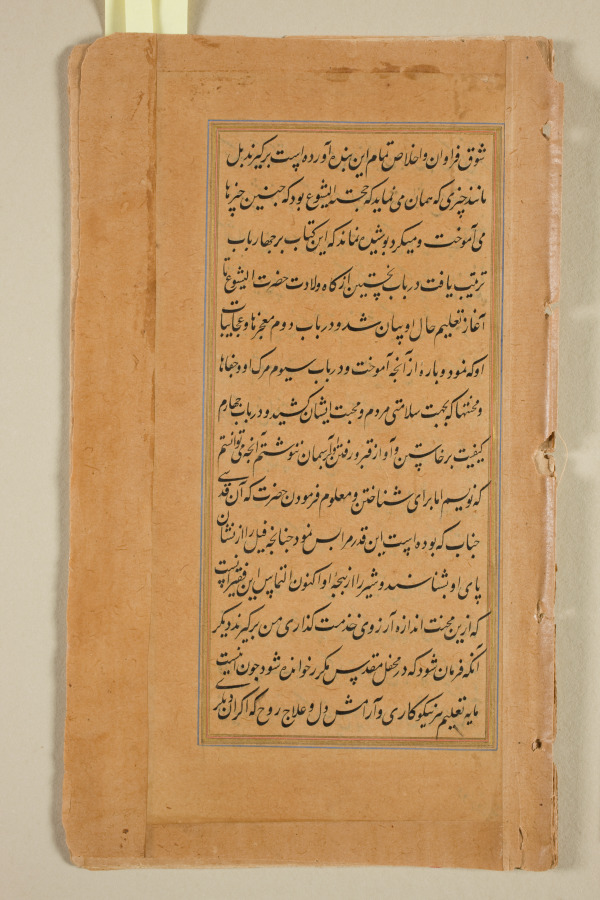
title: Text, Folio 5 (recto), from a Mirror of Holiness (Mir’at al-quds) of Father Jerome Xavier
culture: Mughal India, Allahabad, made for Prince Salim (1569–1627)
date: 1602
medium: Ink and gold on paper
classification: Manuscript